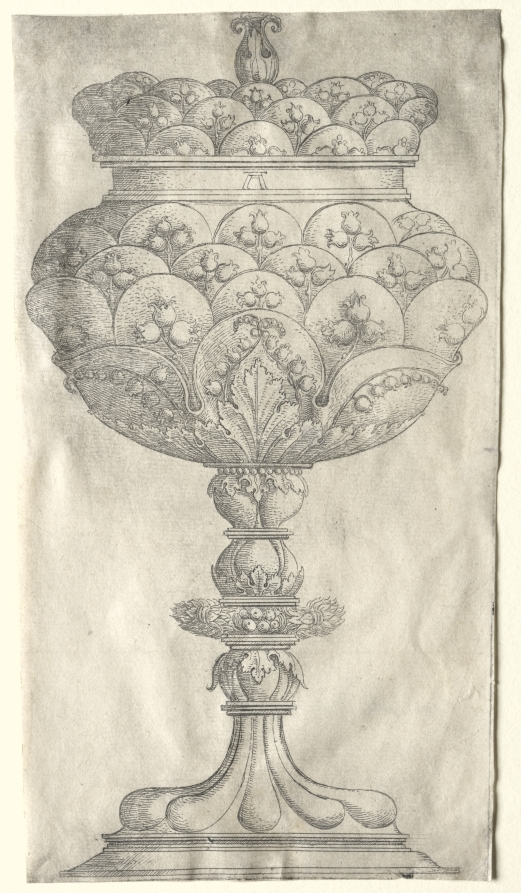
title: Goblet with Lillies of the Valley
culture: Germany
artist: Albrecht Altdorfer (German, c. 1480–1538)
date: c. 1506–38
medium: engraving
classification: Print